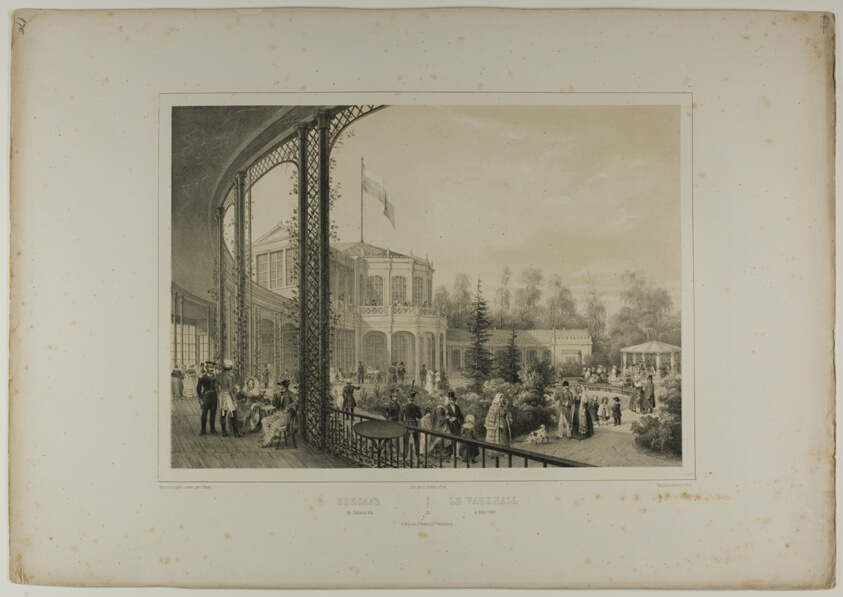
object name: Print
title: The Vauxhall in Pavlovsky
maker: C. Schultz (possibly German, active. c. 1820-1830); after J. Meyer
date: c. 1820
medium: Lithograph in black with second tint stone on ivory wove paper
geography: Germany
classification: lithograph; print; prints and drawing